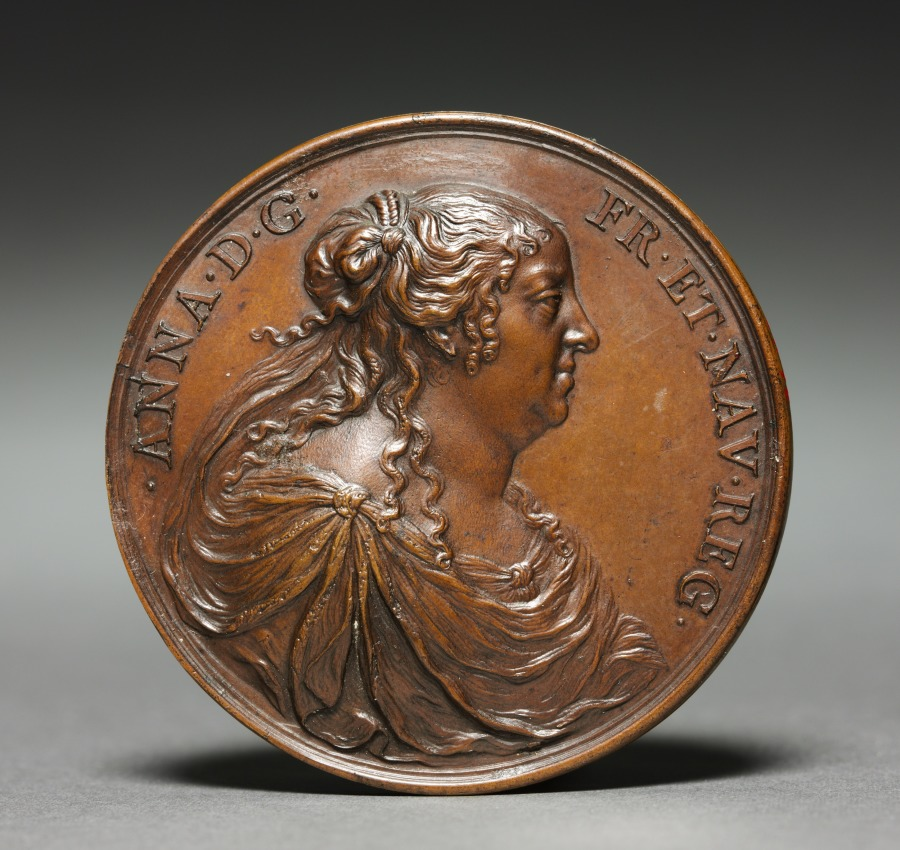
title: Medal of Anne of Austria (obverse) and (reverse)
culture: France, 17th century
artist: Jean Warin (French, 1604–1672)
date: 1660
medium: bronze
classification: Sculpture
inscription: Obverse: .ANNA.D.G. FR.ET.NAV.REG. Reverse: .DIVA.SE.IACTAT.ALVMNA. .1660.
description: Jean Warin was the foremost medalist in 17th-century France. As the chief designer of coins, his relationship with King Louis XIII was exceptionally close; he convinced the king that commemorative medals were the most important artistic medium for propaganda. Warin revolutionized the production of medals by introducing the raised edge, allowing greater ease in striking medals. This change fueled the shift from casting medals to the more recently invented process of striking, or pressing medals from a die. This work is one of many he composed of Queen Anne of Austria (1601–1666). Although she was born in Spain as the Infanta, or princess, of Spain and Portugal, her title "of Austria" refers to her Habsburg heritage as well as her title of Archduchess of Austria. The reverse depicts a blooming lily, a symbol of France, and is inscribed "it glories in its divine nourishment," referring to her son, the adolescent King Louis XIV.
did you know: This medal contains both a traditional portrait as well as a symbolic depiction of another individual.